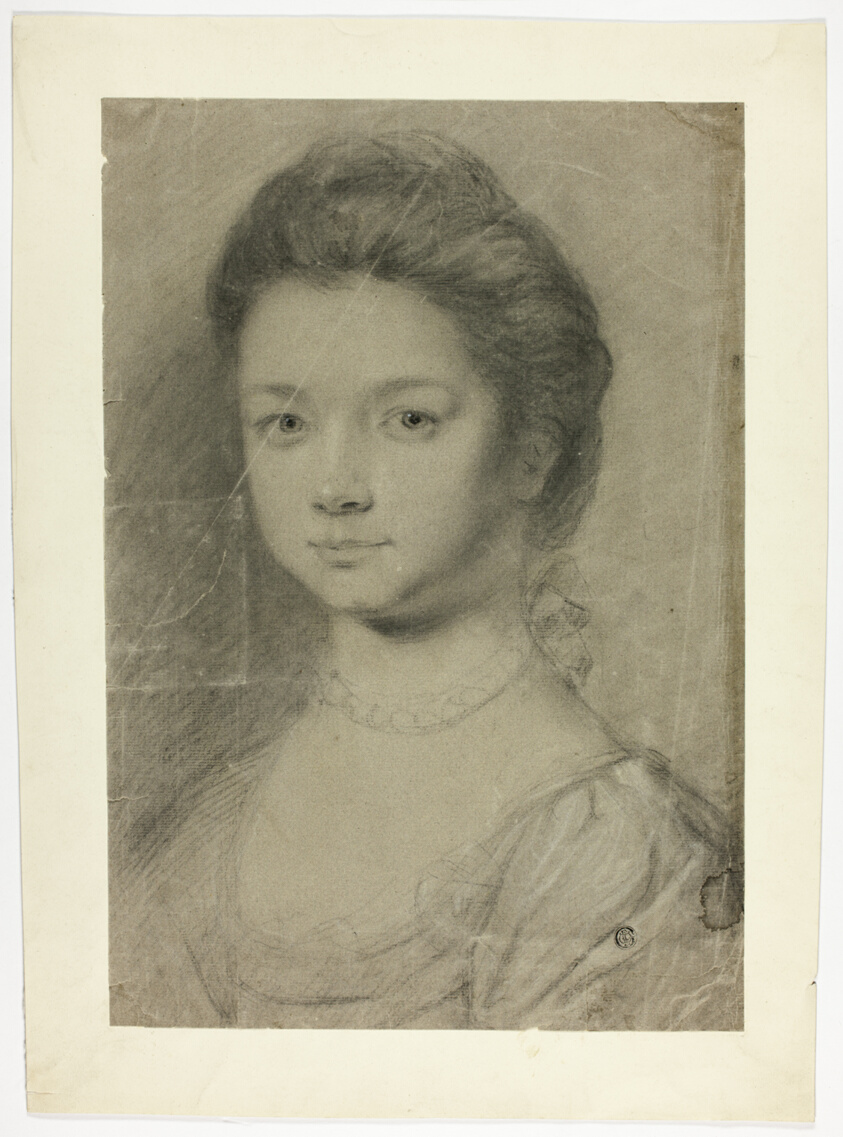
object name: Drawing and Watercolor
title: Portrait Bust of Young Woman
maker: François Boucher (French, 1703-1770); or Giovanni Battista Piazzetta (Italian, 1682-1754)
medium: Black chalk with stumping, heightened with white chalk and traces of white gouache, on gray laid paper with red and blue fibers, tipped onto ivory wove paper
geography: England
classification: charcoal; drawings (visual works); prints and drawing